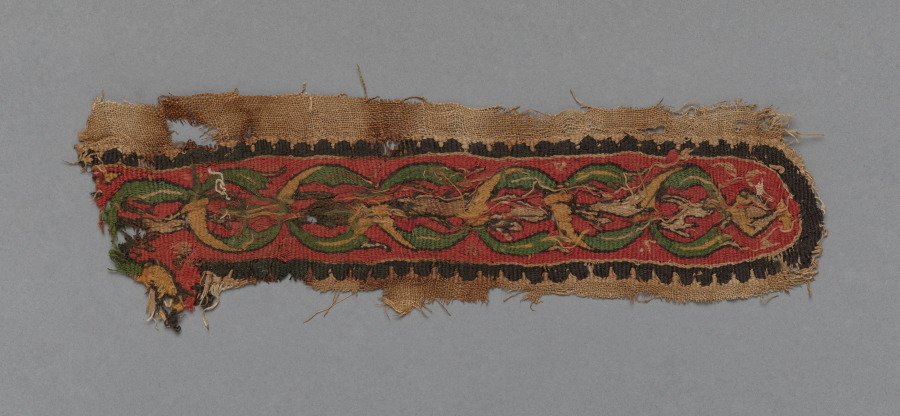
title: Fragment from a Tunic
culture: Egypt, 6th - 16th century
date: 500s - 1500s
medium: tabby weave with inwoven tapestry ornament, linen and wool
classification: Textile